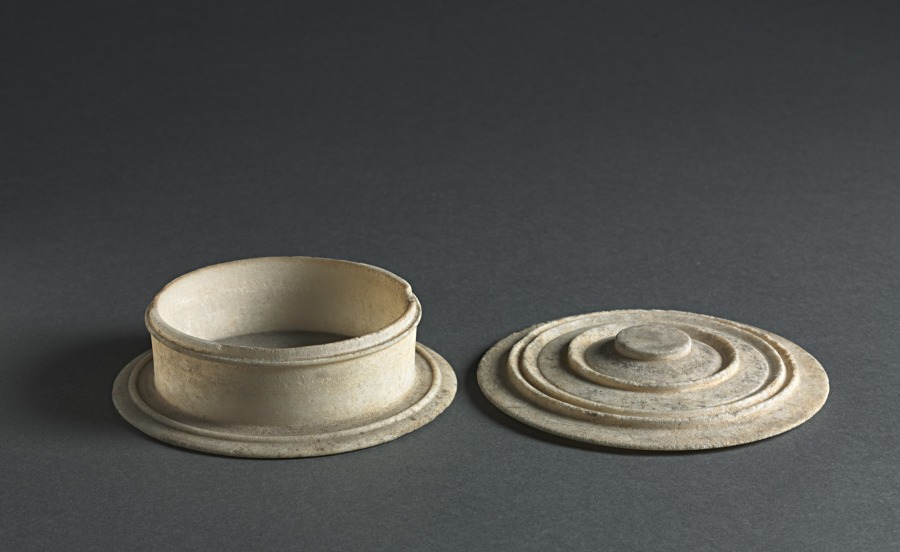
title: Pyxis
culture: Greece, Attic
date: 400–300 BCE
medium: marble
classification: Stone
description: Pyxides came in a huge variety of sizes, shapes, and materials in the ancient world. Images of pyxides in Greek art often show them being used by women, which has led scholars to believe that they may have been used to hold jewelry or cosmetics. This pyxis is one of few surviving examples made from stone, signifying that it may have had an elite owner.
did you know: This vessel has a threaded lid, like a modern mason jar, allowing it to be tightly sealed.